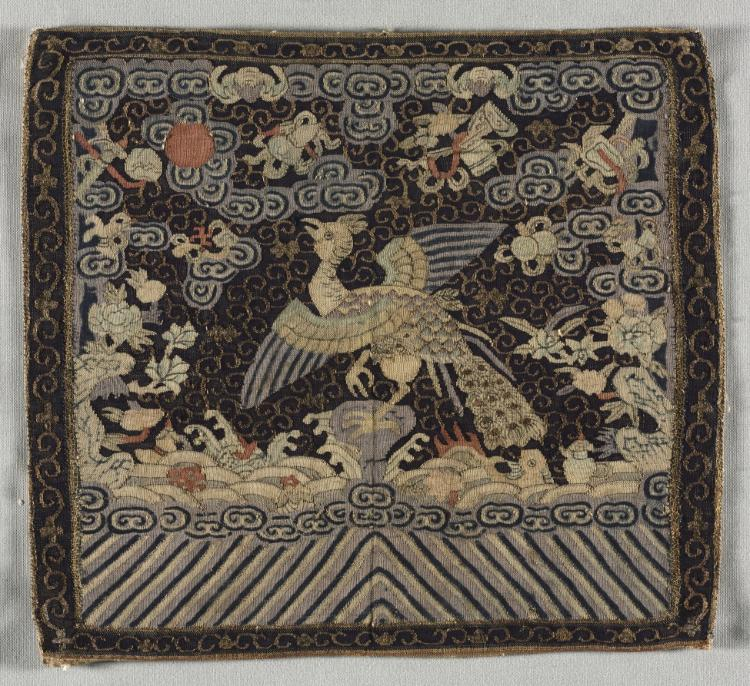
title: Rank Badge (buzi)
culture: China, Qing dynasty (1644-1911)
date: 1850–99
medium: silk; slit tapestry weave (kesi)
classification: Textile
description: Rank badges (also called rank insignia or Mandarin squares) were used in China during the Ming (1368–1644) and Qing (1644–1911) dynasties to demonstrate the wearer’s rank. In 1391 new clothing regulations directed court officials to wear decorative squares indicating their rank—birds for civil officials and animals for military officials. During the Qing dynasty rank badge design was regulated, and certain creatures were associated with specific ranks. Qing badges depict a representation of the universe with a landscape and a central creature, surrounded by clouds and facing the sun. The sun represented the emperor and this composition showed the official’s loyalty to him. An official’s wife wore rank badges that mirrored her husband’s. Most of the examples in CMA’s collection depict creatures facing a sun on the left. Attached to the front and back of a ceremonial robe, rank badges were woven in pairs with identical imagery. One was divided vertically up the center to attach to the front of a robe with a center opening. Rank badges are generally square or rectangular, although round examples exist. They are typically satin weave or slit tapestry weave (kesi) silk. Satin weave badges often have dark backgrounds with silk and/or metal thread embroidery. Some badges incorporate peacock feathers or beads. Late in the Qing dynasty appliqué replaced embroidery to allow for quicker production and a change in rank.